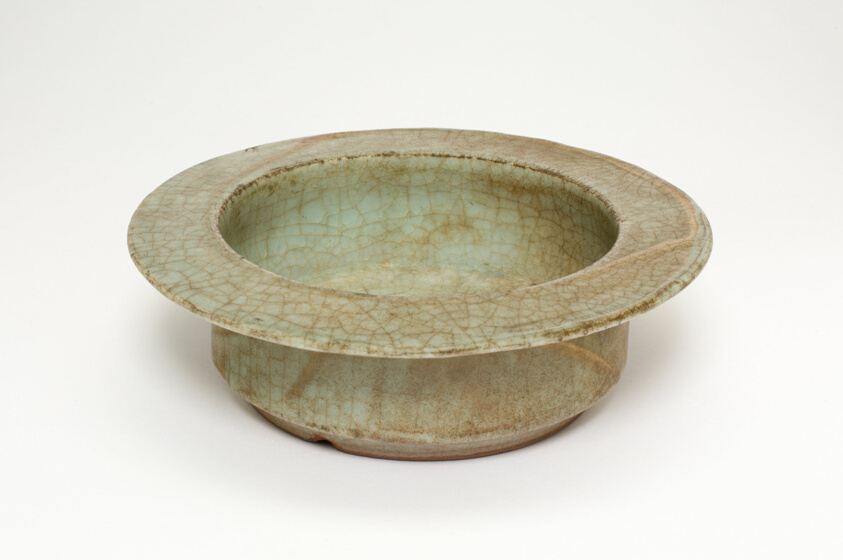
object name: Vessel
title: Dish with Wide Rim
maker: China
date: Song Dynasty (960–1279)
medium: Stoneware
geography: China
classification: ceramics; asian art